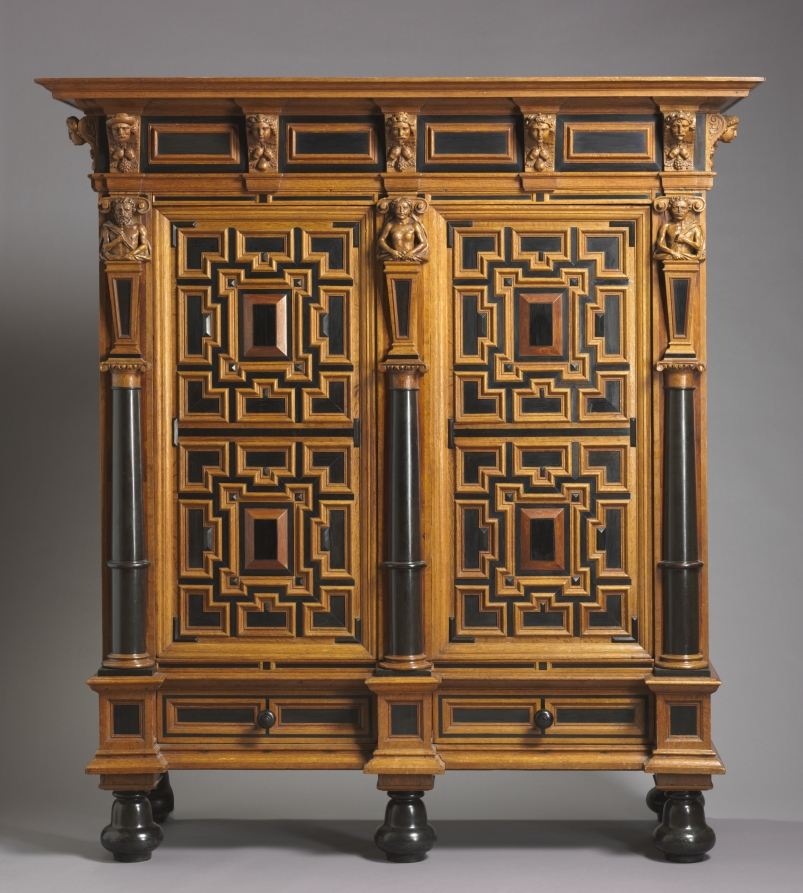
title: Wardrobe (Kast)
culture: Netherlands, Holland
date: c. 1625–50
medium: oak with ebony and rosewood veneers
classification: Furniture and woodwork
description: After the founding of the Dutch East India Company in 1602, the use of exotic, imported wood veneers in furniture became more prevalent. So too did the use of perspective and mathematical systems in laying out the veneers. The combination produced a style of decoration that spread across Europe and even to the young colonies in America.